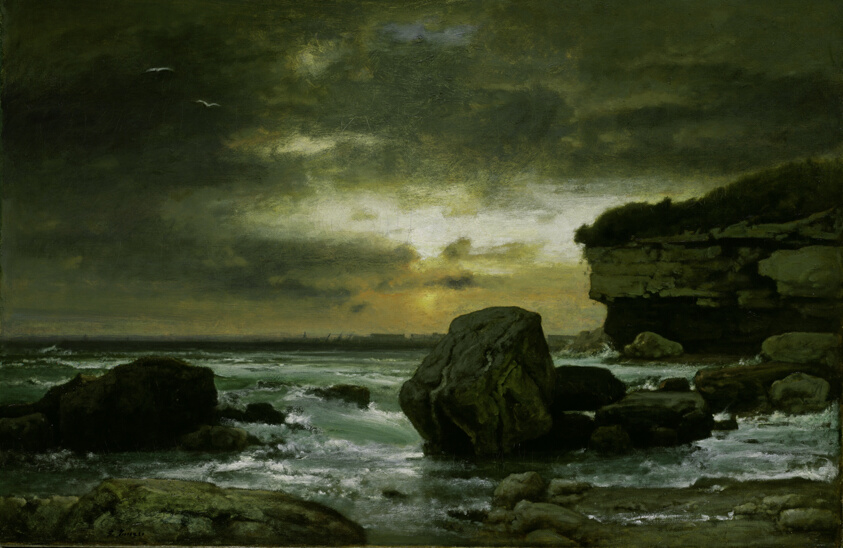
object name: Painting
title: A Marine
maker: George Inness (American, 1825–1894)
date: c. 1874–75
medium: Oil on canvas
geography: United States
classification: painting; american arts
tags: landscapes